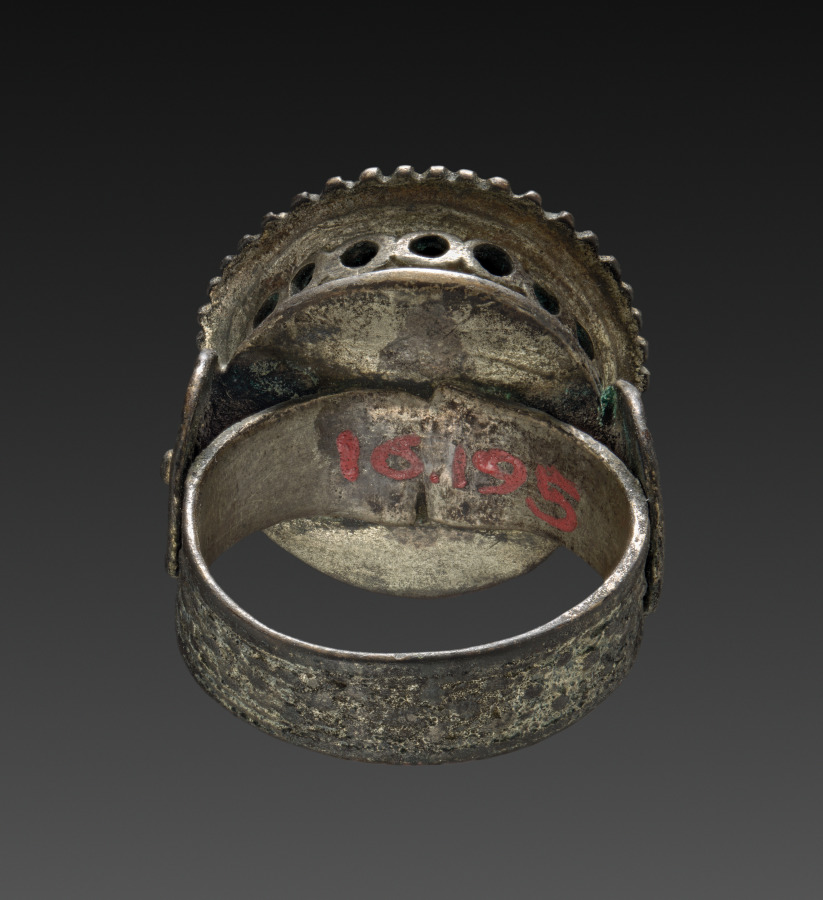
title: Ring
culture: Yugoslavia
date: 1800s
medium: silver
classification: Jewelry